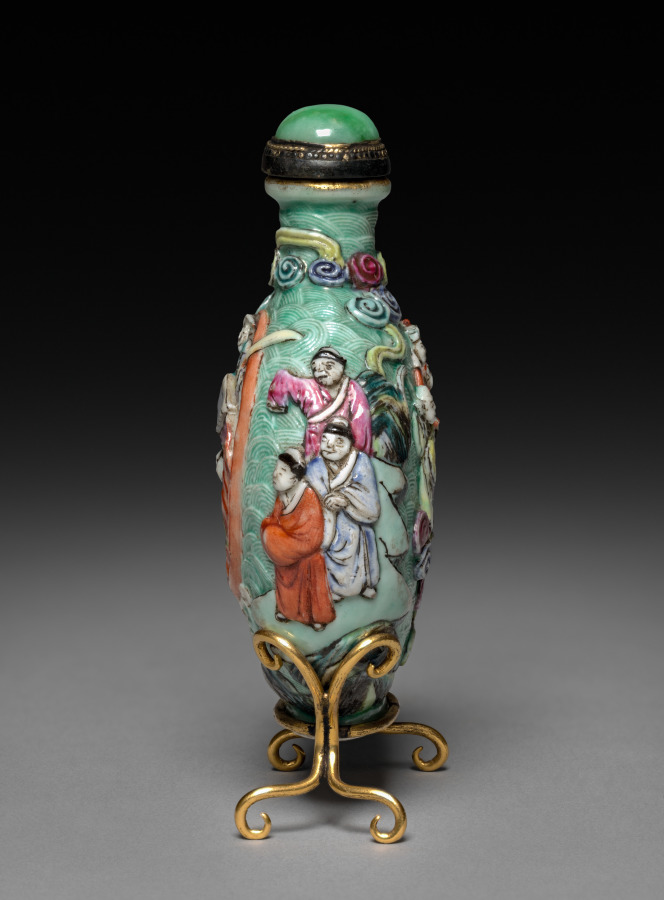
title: Flattened Ovoid Snuff Bottle with Stopper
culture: China, Qing dynasty (1644-1911), Jiaqing reign (1796-1820)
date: 1796–1820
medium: porcelain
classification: Ceramic